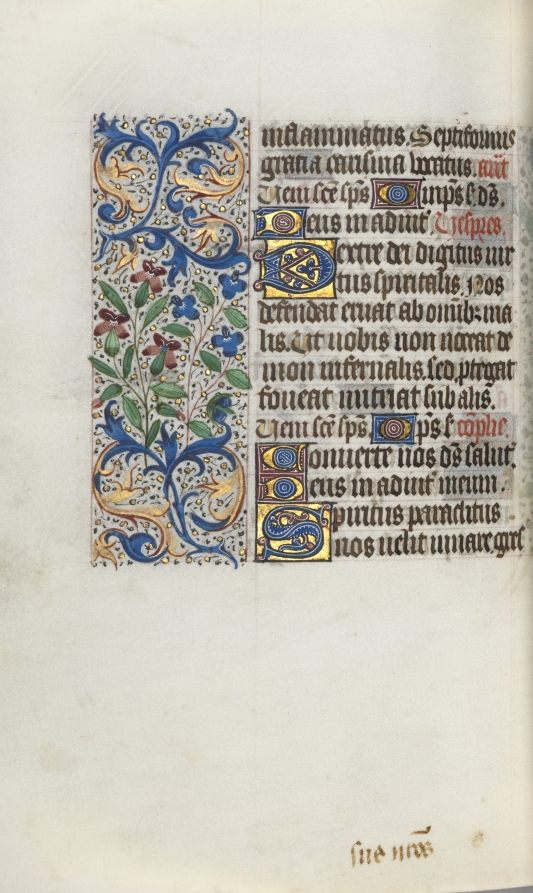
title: Book of Hours (Use of Rouen): fol. 101v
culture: France, Rouen, 15th century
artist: Master of the Geneva Latini (French, active Rouen, 1460–80)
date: c. 1470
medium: ink, tempera, and gold on vellum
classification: Bound Volume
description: In the late 1400s and early 1500s Rouen was an established and important center of book production. The city’s cathedral had a wealthy chapter that spent large sums of money to commission books and to maintain its extensive library. The stationers and booksellers would have likely been concentrated in or near the cathedral precinct. This artist, named after a manuscript now in Geneva, was Rouen’s principal illuminator during the second half of the 1400s.